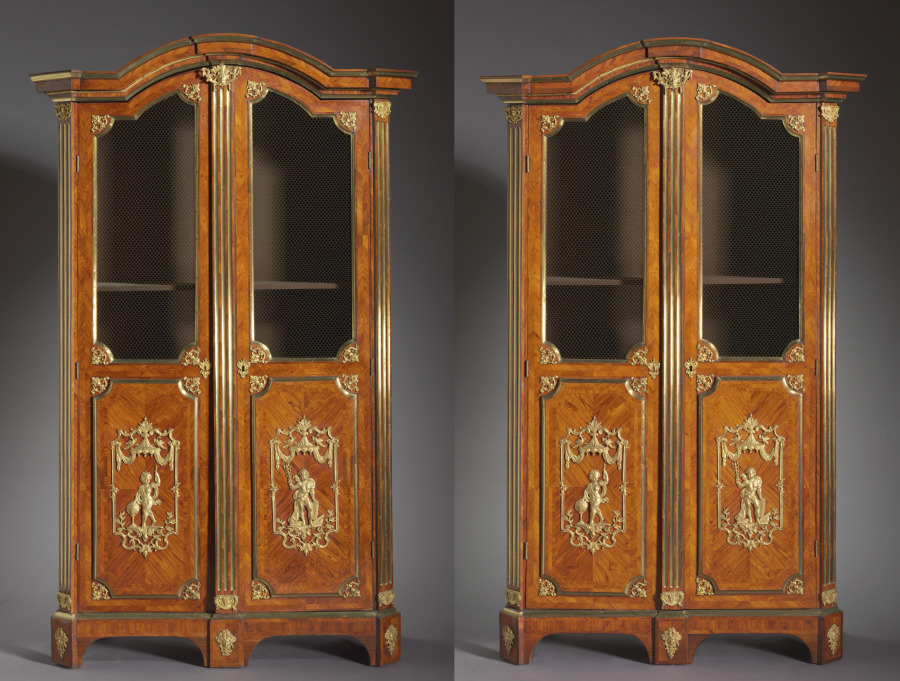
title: Pair of Bookcases (Bibliothèques)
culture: France, 18th century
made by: attributed to Charles Cressent (French, 1685–1768)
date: c. 1720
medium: kingwood and rosewood veneers, gilt metal mounts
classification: Furniture and woodwork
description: One of the obligations of a wealthy existence in the early 1700s was an interest in reading, or at least the impression of developing such an interest. Large bookcases such as these helped in that pursuit as they kept elaborately leather-bound books neatly behind a screen. The broad panels of marquetry and gilt-bronze mounts below suggest that the overall decorative scheme of figures symbolizing Geography and Commerce was perhaps more prominent than the rich intellectual holdings within.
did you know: Pairs of bookcases such as these would have likely flanked a large fireplace within the library of a grand house.